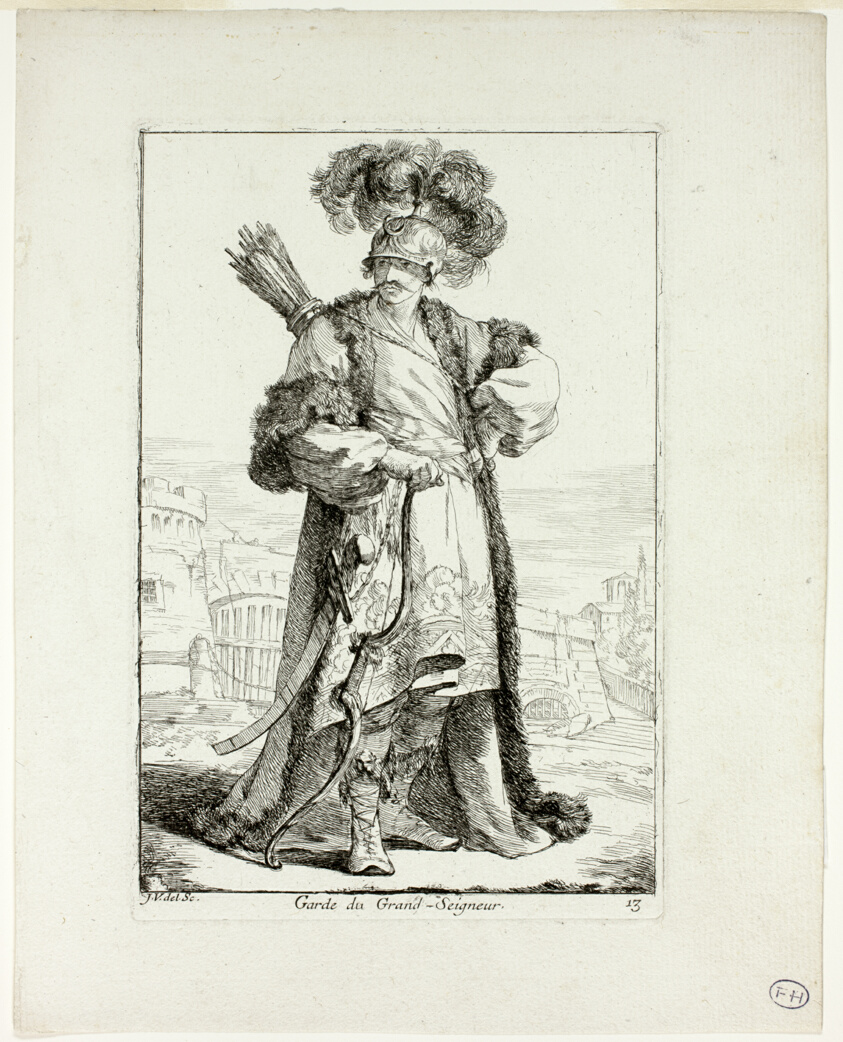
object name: Print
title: Garde du Grand Seigneur, plate thirteen from Caravanne du Sultan à la Mecque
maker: Joseph-Marie Vien, the elder; French, 1716–1809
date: 1748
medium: Etching on ivory laid paper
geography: France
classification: etching; paper; print; prints and drawing